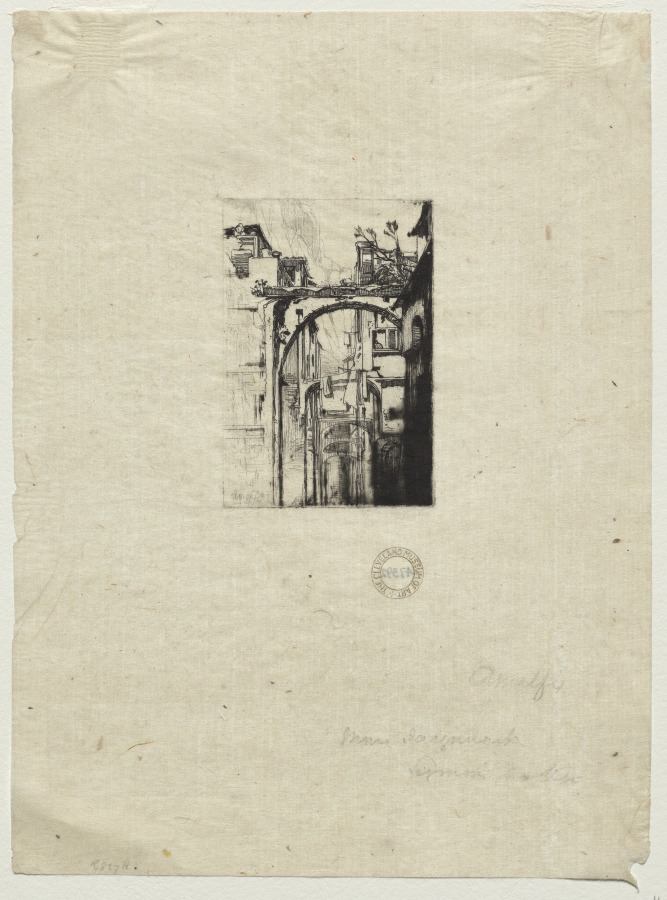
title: Amalfi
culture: England, 19th century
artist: Francis Seymour Haden (British, 1818–1910)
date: 1844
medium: etching and drypoint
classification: Print